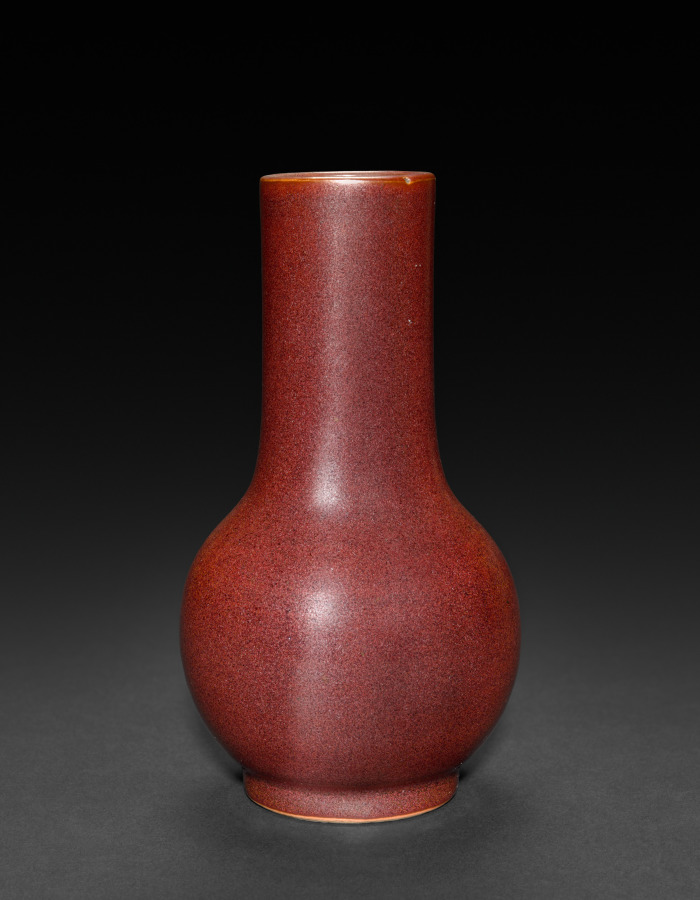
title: Bottle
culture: China, Qing dynasty (1644–1911), Qianlong reign (1736–95)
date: 1736–95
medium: porcelain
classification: Ceramic